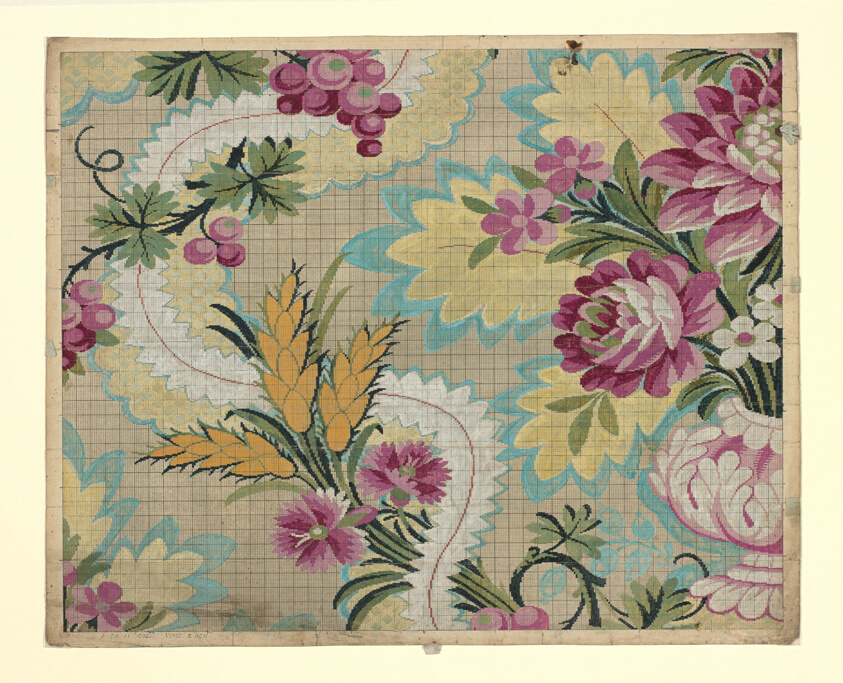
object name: Drawing and Watercolor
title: Mise-en-carte (Point-paper)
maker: Designed by Germain Frères; France, Lyon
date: 1760/90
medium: Ink and gouache on hand drawn graph paper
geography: France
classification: textile; accessory - paper design